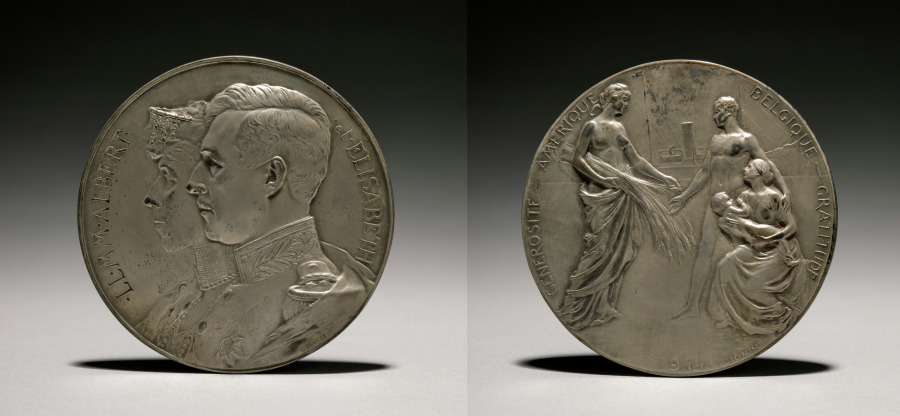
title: Medal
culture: Belgium, early 20th century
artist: Godefroid Devreese (Belgian, 1861–1941)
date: 1914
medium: bronze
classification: Metalwork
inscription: obverse - "LL.MM.ALBERT et ELISABETH"; signed: "G. Debreese." reverse - "Generosite -- Amerique. Belgique -- Gratitude"; signed: "1914 G. Devreese."